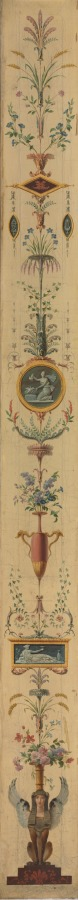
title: Decorative Panel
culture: France, 18th century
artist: Pierre Rousseau (French, 1751–1829)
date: 1790s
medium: oil on canvas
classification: Painting